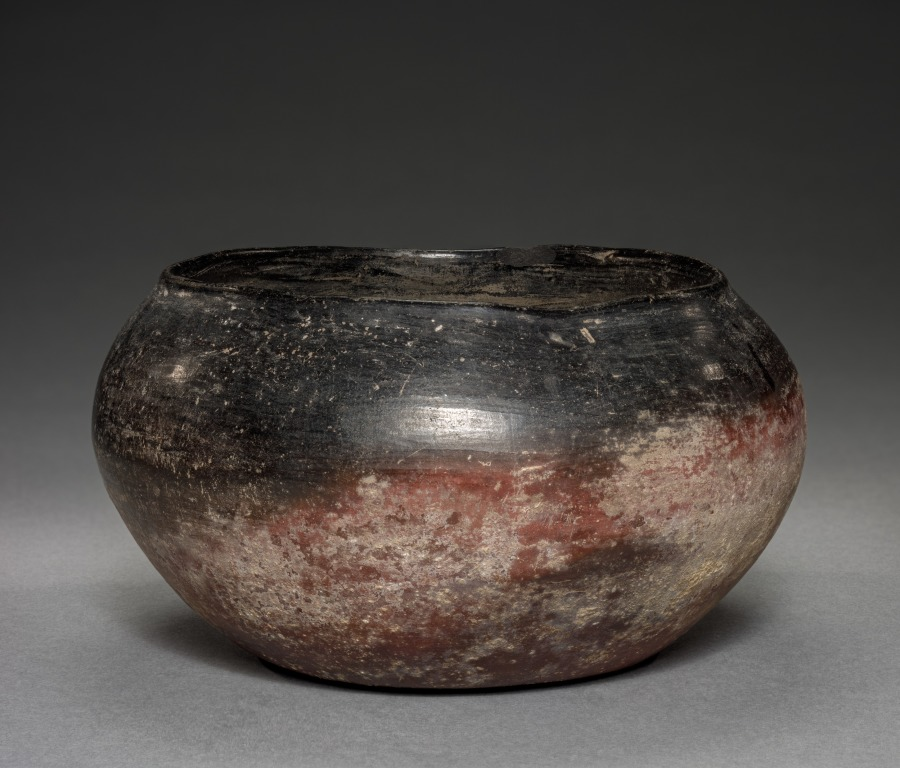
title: Black-Topped Bowl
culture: Egypt, Predynastic (5000–2950 BCE), Naqada II (3650–3300 BCE)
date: 4000–3000 BCE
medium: Nile silt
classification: Vessels